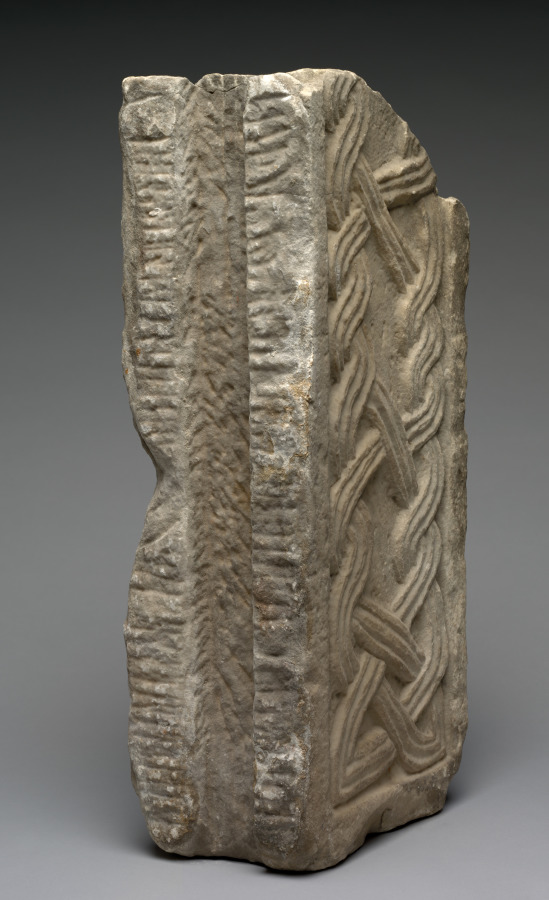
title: Transenna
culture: Lombardic, Italy, Migration period, 8th-9th Century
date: 700s-800s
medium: marble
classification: Sculpture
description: In Christian architecture a transenna is an openwork screen of stone or metal enclosing a shrine. These transenna elements were found in Rome; the posts were said to have been excavated on the Coelian Hill and may have originally formed part of the transenna of the Church of San Saba. The Lombards were an ancient Germanic-speaking tribe that settled in Italy after 568. Their artistic tradition was originally centered on small objects of personal adornment like buckles and brooches. After occupying Italy, the Lombards found themselves in contact with large-scale sculpture of classical and early Christian origin that, by the end of the 700s, they had learned to adopt and imitate, as seen here.